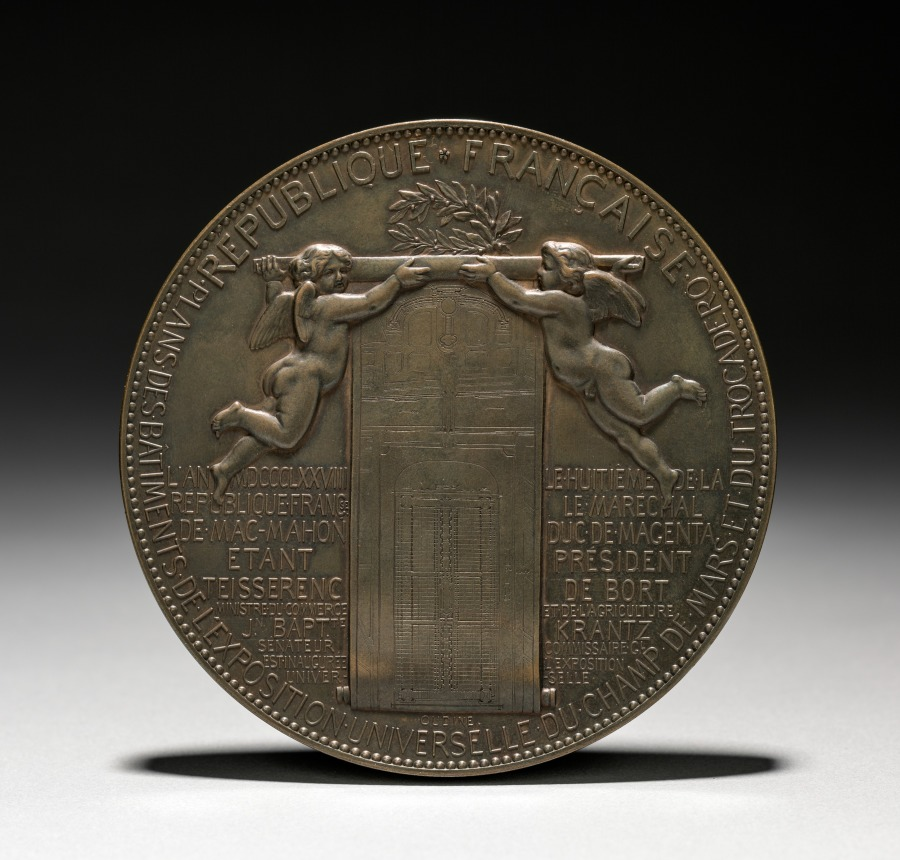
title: Medal (reverse)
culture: France, 19th century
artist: Eugène André Oudiné (French, 1810–1887)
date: 1878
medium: bronze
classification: Metalwork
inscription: "REPUBLIQUE . FRANCAISE . PLANS . DES . BÂTIMENTS . DE . L'EXPOSITION . UNIVERSELLE DU . CHAMP . DE . MARS . ET . DU . TROCADERO." [More text in center of medal.]